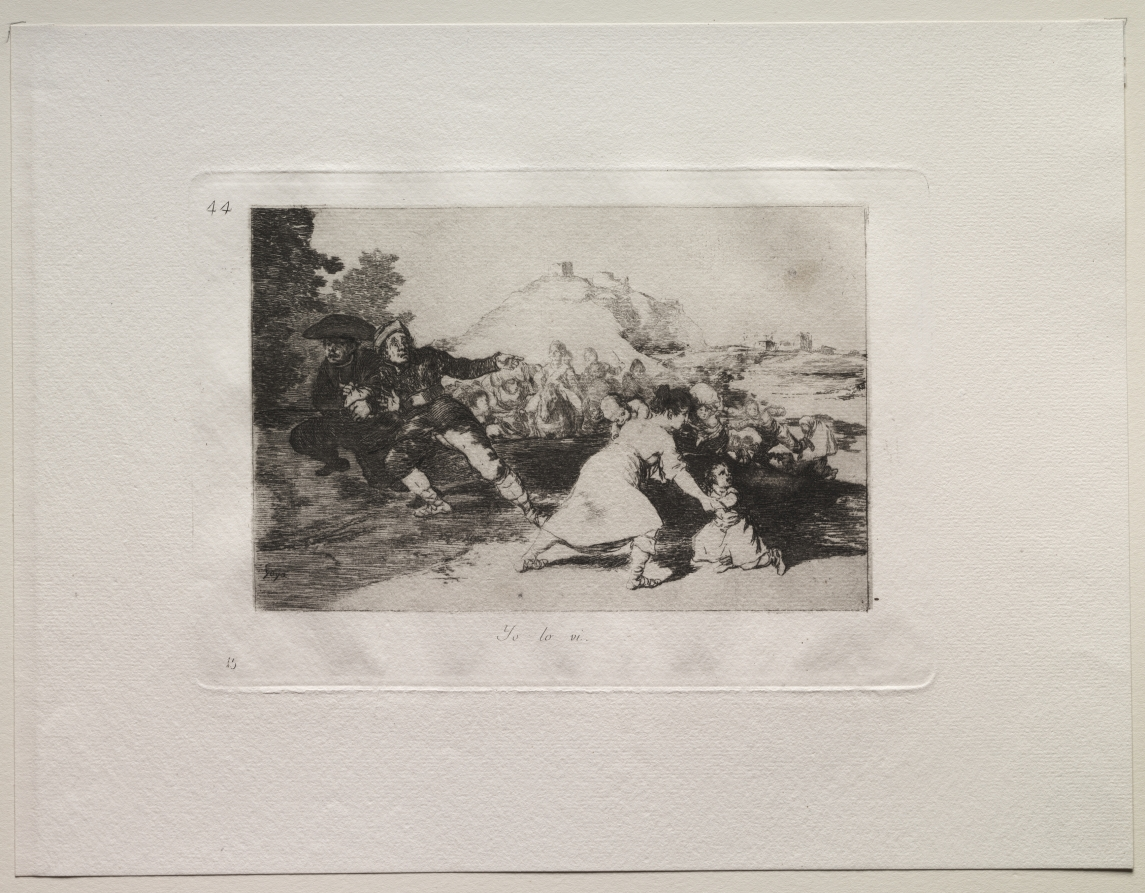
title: The Horrors of War: I Saw It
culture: Spain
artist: Francisco de Goya (Spanish, 1746–1828)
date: c. 1810–20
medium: etching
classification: Print